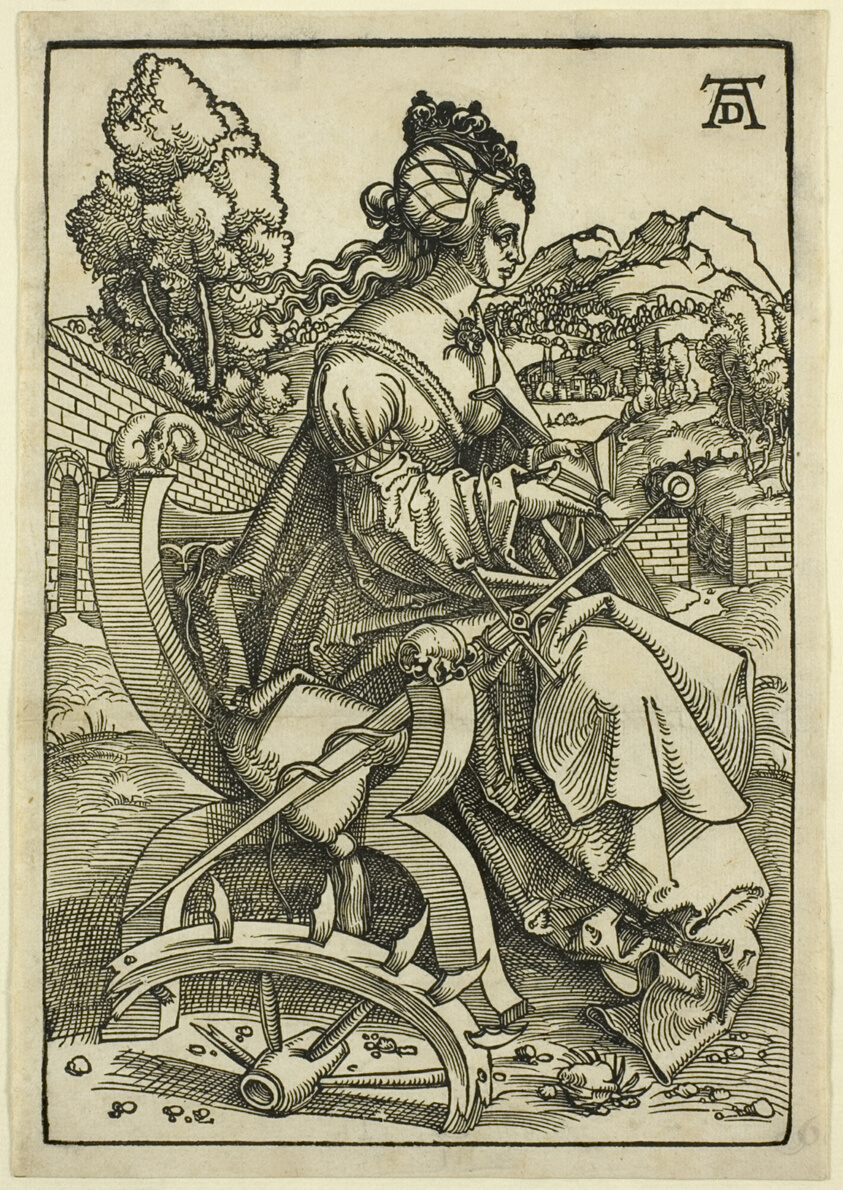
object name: Print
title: Saint Catherine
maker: Hans Baldung Grien (German, 1484/85-1545); with added monogram of Albrecht Dürer (German, 1471–1528)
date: 1505/07, printed c. 1580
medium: Woodcut in black on cream laid paper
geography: Germany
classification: woodcut; print; prints and drawing